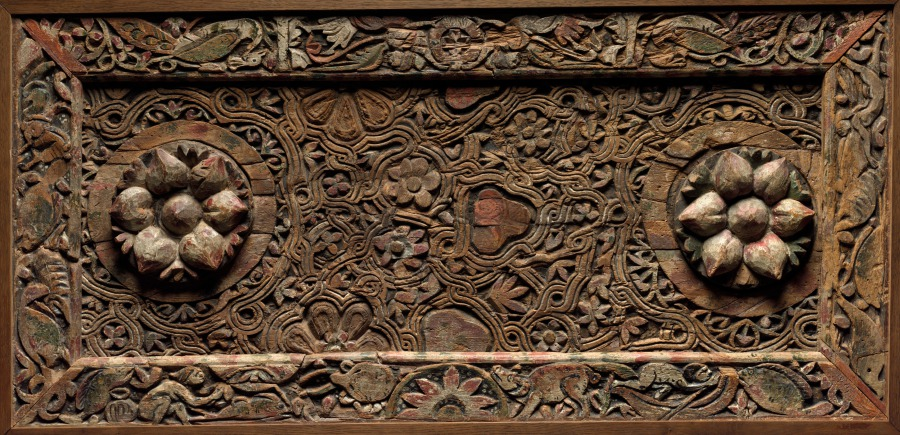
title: Ornamental Panel (from a Ceiling?)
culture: Egypt, Coptic period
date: 500s (frame) and 700s (central panel)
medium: wood with paint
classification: Furniture and woodwork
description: This wooden panel and its frame come from different locations. The four narrow panels forming the outer frame are stylistically datable to the 500s. The large central rectangular panel might date to the 700s. It is most likely a carved ceiling, but its architectural context is unknown. Both panel and frame have been cut down and joined together at some point in their history under unknown circumstances. The decorative program of the main panel features two large rosettes surrounded by florets, leaves, and fruit. The outer frame features two flying angels holding a wreath, a peacock, an octopus, a seated fisherman who holds a long line with a fish attached, and a swimming boy with a dolphin. The vocabulary of the frame is dominated by water life, particularly of the Nile and its banks. Though separated from its original place and altered, this important object provides a welcome glimpse of an architectural interior from early Christian Egypt.